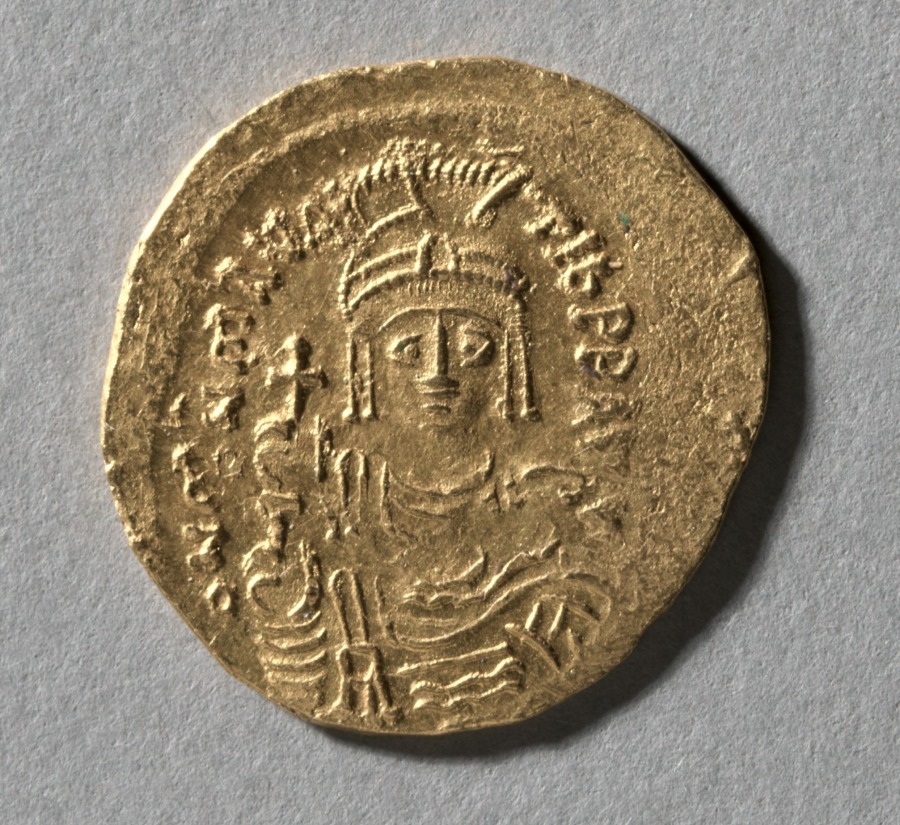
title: Solidus of Maurice Tiberius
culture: Byzantine, 6th-7th century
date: 583–602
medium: gold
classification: Coins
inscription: (Avers): DN MAVRC TIbPPAV[C] (Revers): VICTOR[I] AAVC[CI] and CONO[B]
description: This coin was minted by Maurice Tiberius, an emperor best known for his military prowess and his successes in the war against the Persians.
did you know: The solidus coin was first made in AD 301 in Rome.